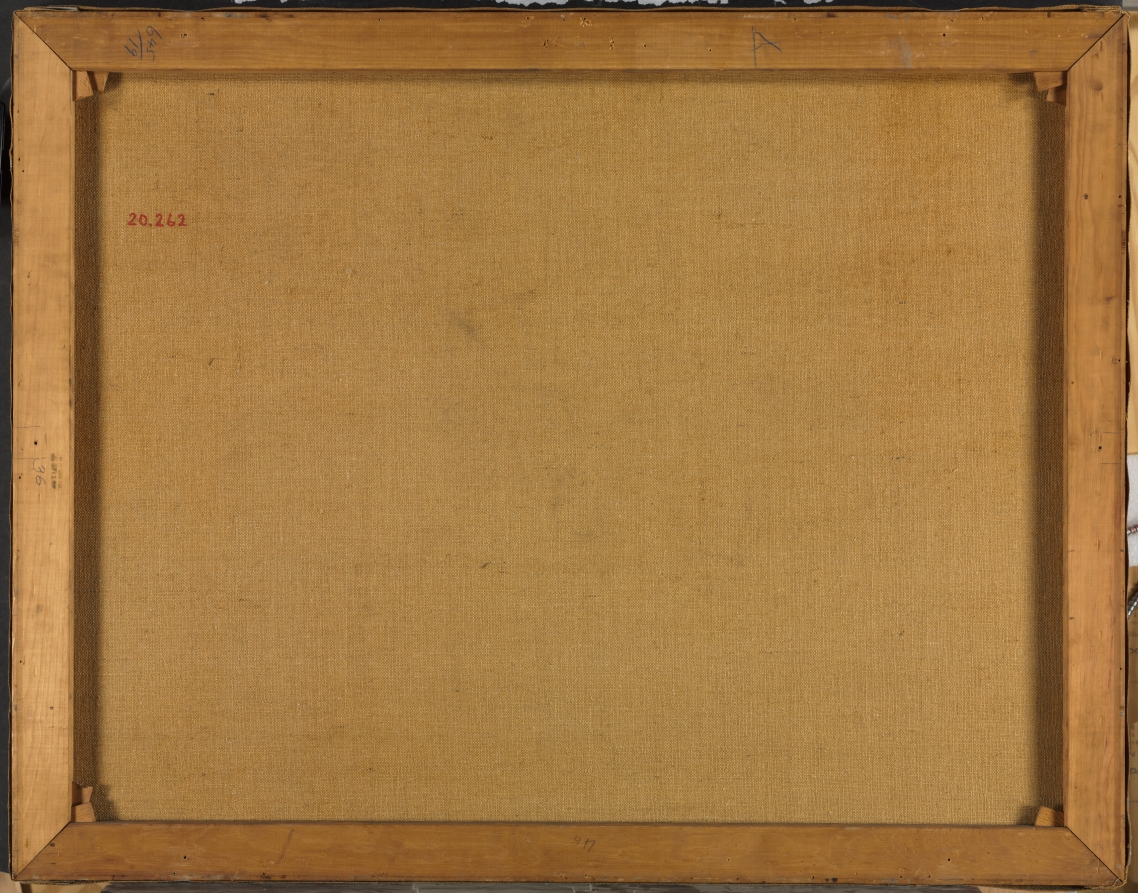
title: Early Spring, California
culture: America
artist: Edward B. Butler (American, 1853–1928)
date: 1918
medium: oil on canvas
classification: Painting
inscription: Signed lower right: Edward B. Butler - -1918